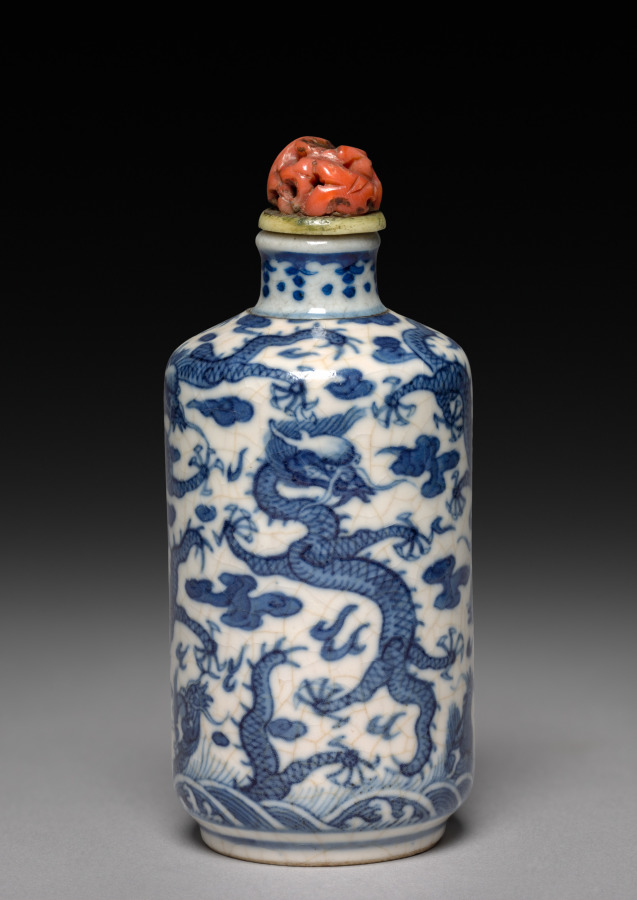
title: Snuff Bottle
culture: China, Qing dynasty (1644-1911), Kangxi reign (1662-1722)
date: 1662–1722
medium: porcelain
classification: Ceramic